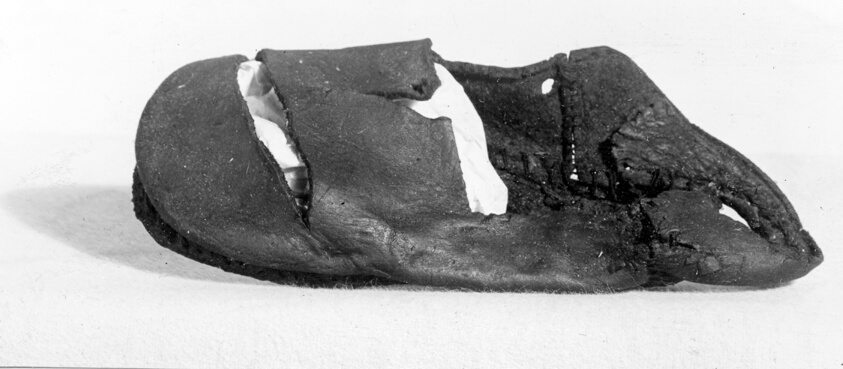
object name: Costume and Accessories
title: Child's Shoe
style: elizabethan, tudor, european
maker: England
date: 16th century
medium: Leather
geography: England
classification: textile; costume accessory - shoe; shoes - misc; costume; dress (garment); clothing